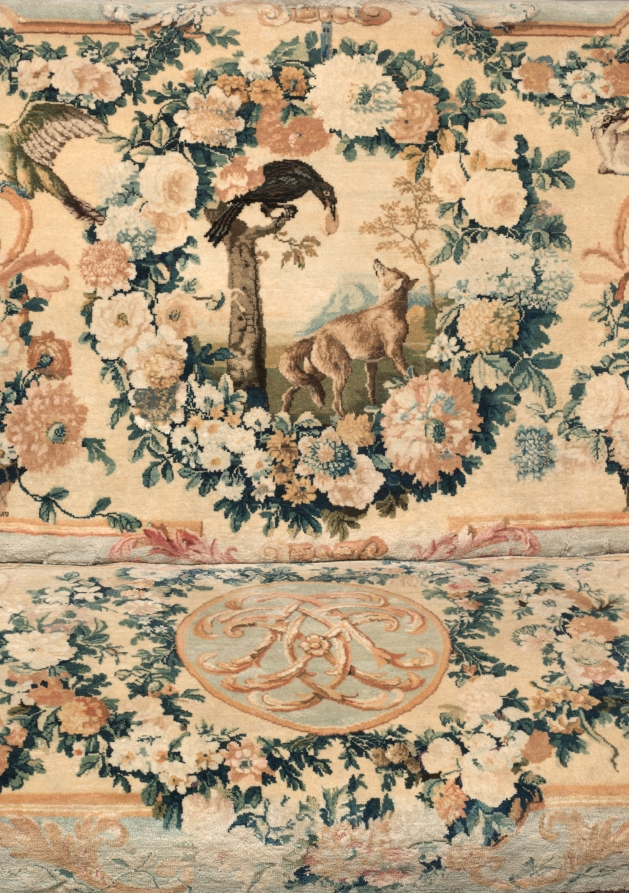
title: Settee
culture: France, 18th century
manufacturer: Royal Savonnerie Manufactory, Chaillot Workshops (French, est. 1627)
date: before 1717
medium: carved wood, Savonnerie knotted-pile (symmetrical rug knot) upholstery; wool, hemp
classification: Furniture and woodwork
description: These chairs belong to a suite that includes a settee (also in the CMA’s collection) and a tapestry made for a count and countess to mark their wedding in 1717. Furniture of this scale was usually placed against the wall in grand reception halls, more as a display of wealth than for use. Upholstered in Savonnerie tapestries, this suite was among the most treasured and expensive example anyone could own and typically reserved for royalty. To add decorative and intellectual interest to the textiles, weavers incorporated symbols depicting various stories from the Fables of Jean de La Fontaine, published from 1668 to 1694 and largely adapted from Aesop and other early storytellers.